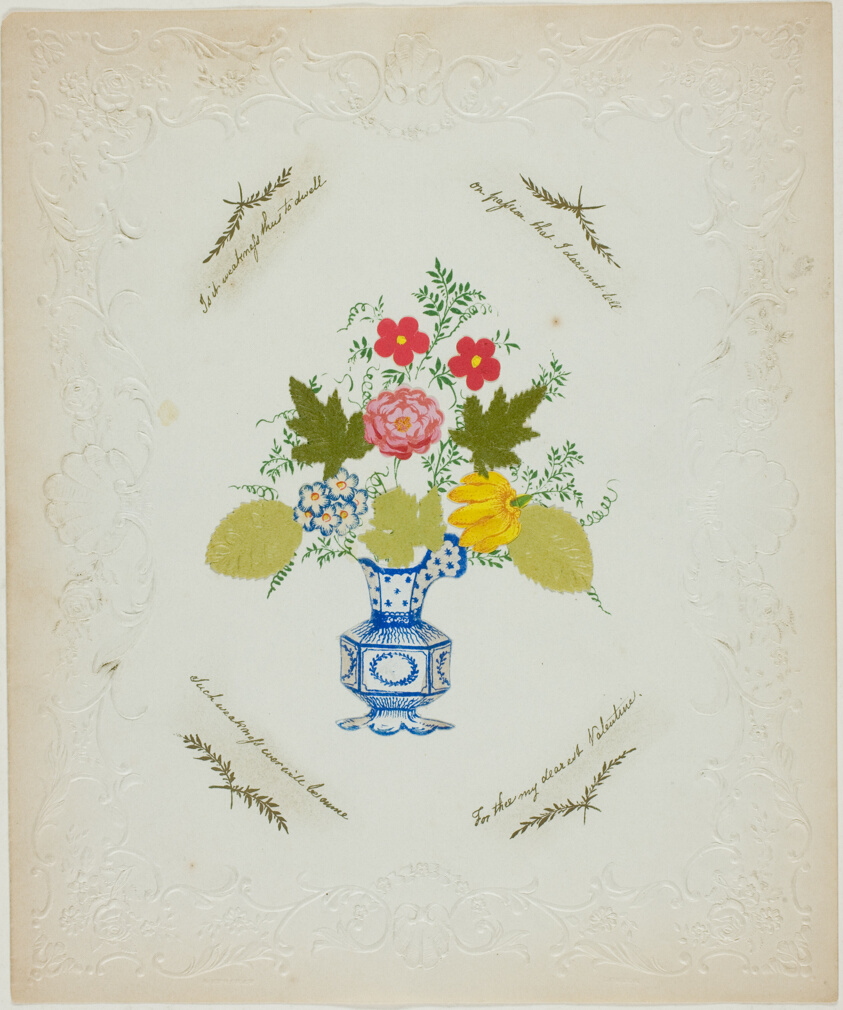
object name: Drawing and Watercolor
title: It is Weakness thus to Dwell (Valentine)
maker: George Kershaw (English, 19th century)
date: c. 1850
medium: Collaged elements on color lithograph on embossed off-white wove paper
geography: England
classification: valentine; prints and drawing; paper